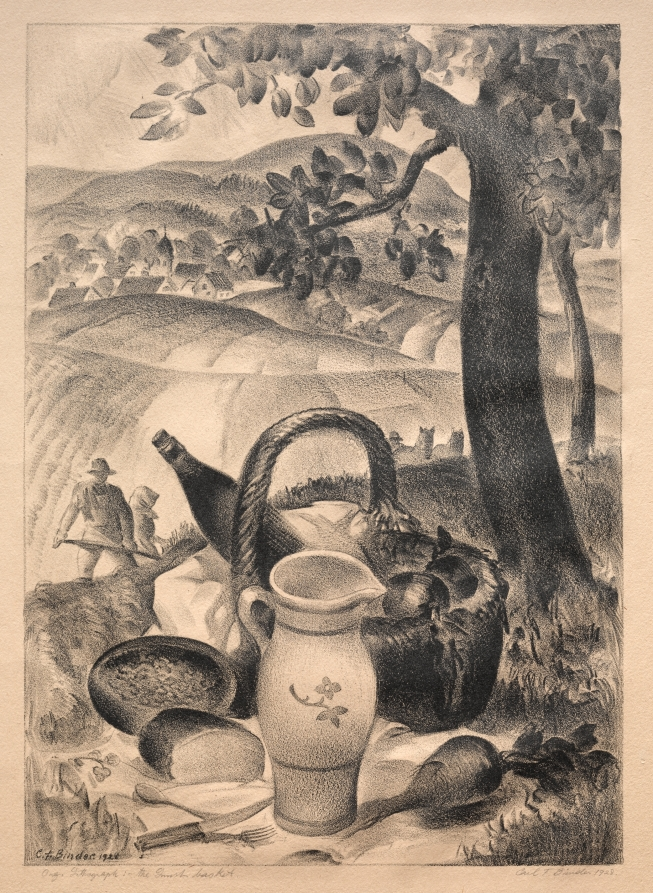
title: The Lunch Basket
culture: America, Ohio, Cleveland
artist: Carl F. Binder (American, 1887–1968)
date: 1928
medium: lithograph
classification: Print